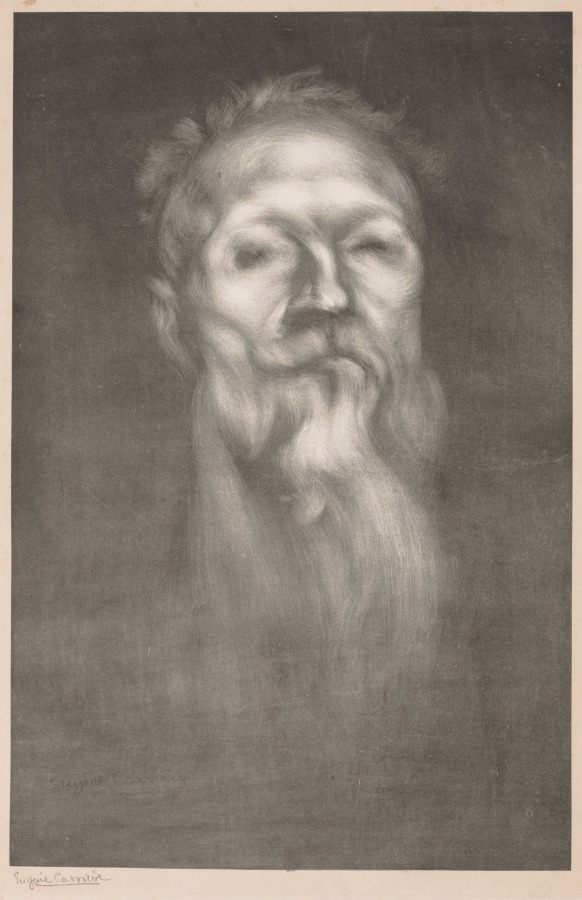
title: Auguste Rodin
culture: France, 19th century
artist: Eugène Carrière (French, 1849–1906)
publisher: Lemercier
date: 1897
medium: lithograph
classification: Print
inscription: signed, lower left, in graphite: Eugène Carrière; signed, lower left, in stone: Eugène Carrière